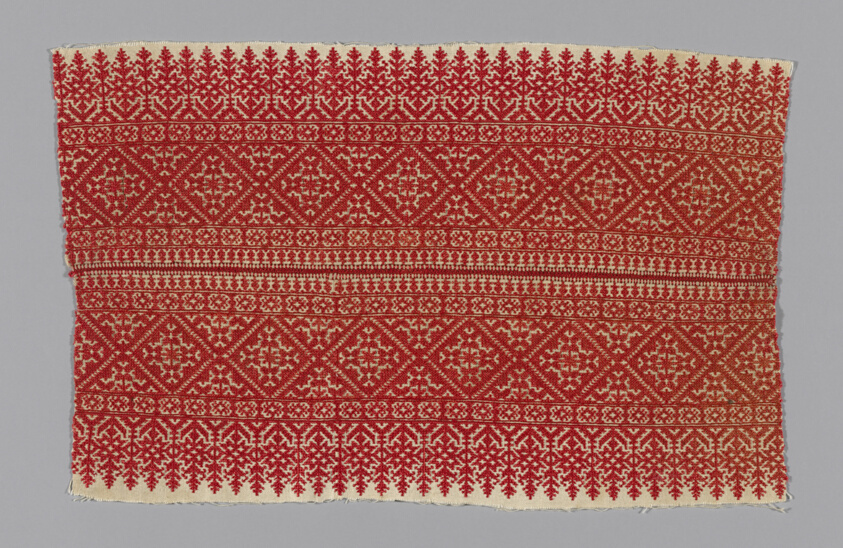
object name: Textile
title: Fragment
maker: Morocco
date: 19th century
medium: Two bands of cotton, plain weave; embroidered with silk flossin back, Bosnian, chained border, double running, hem, and single faggot stitches; joined by buttonhole and singel feather stitches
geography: Morocco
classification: textile; needlework (visual works); weaving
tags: morocco